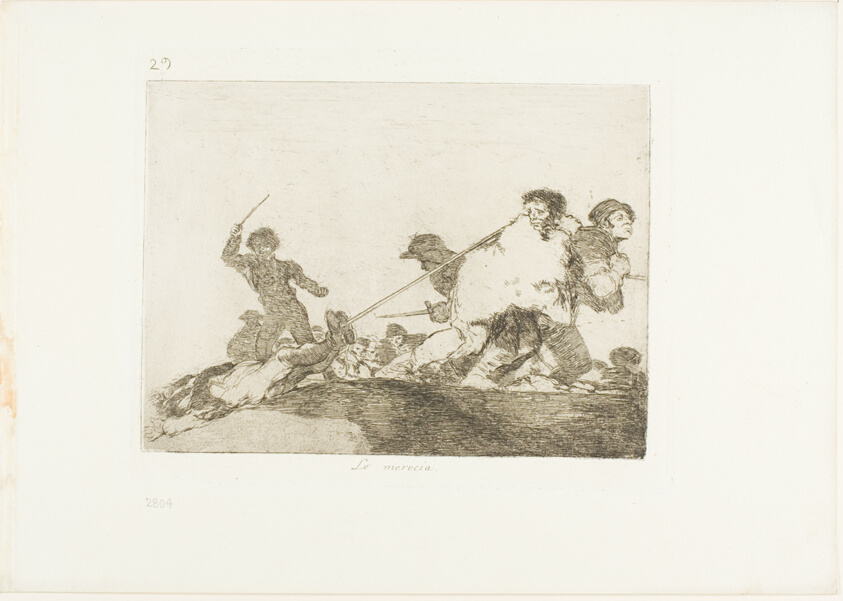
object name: Print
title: He deserved it, plate 29 from The Disasters of War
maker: Francisco José de Goya y Lucientes (Spanish, 1746-1828)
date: 1814/20, published 1863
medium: Etching, drypoint, burin and burnishing on ivory wove paper with gilt edges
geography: Spain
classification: etching; print; prints and drawing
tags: war